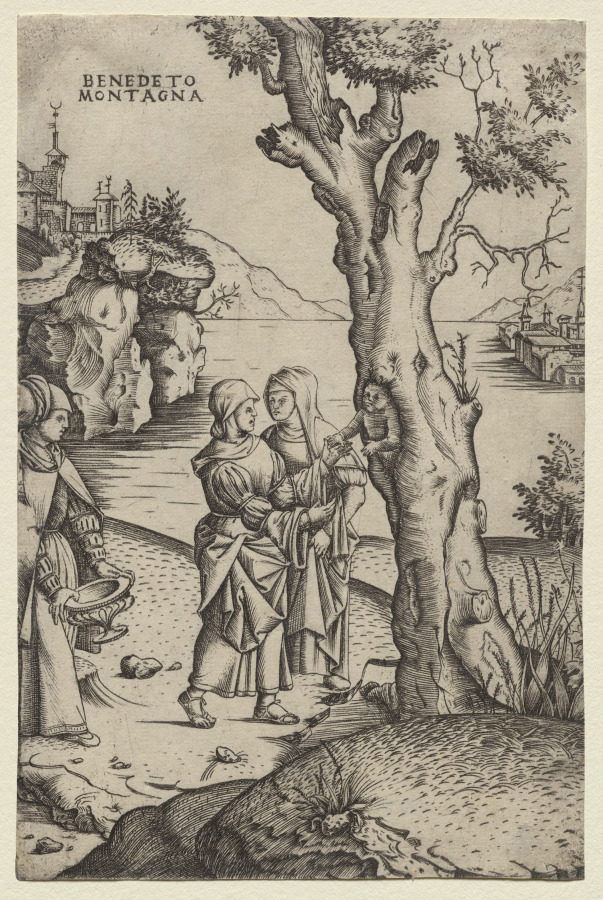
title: Birth of Adonis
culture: Italy, 16th century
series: The Metamorphoses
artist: Benedetto Montagna (Italian, c. 1481–1555/58)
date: c. 1515–20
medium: engraving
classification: Print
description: With tiny hands outstretched, the infant Adonis emerges from a prominent tree. Benedetto Montagna depicts the babe as if miraculously extracted from the bark in the manner of Eve’s creation from Adam’s side. But close attention to the sinuous trunk reveals Adonis to be actually born of a wooden womb. His mother Myrrah, after conceiving incestuously, pleaded that the gods deny her both life and death for her crime: she was thus transformed into a tree. Often moralized for later Christian audiences, tales such as this from Ovid’s popular Metamorphoses warned the viewer against following taboo desires.